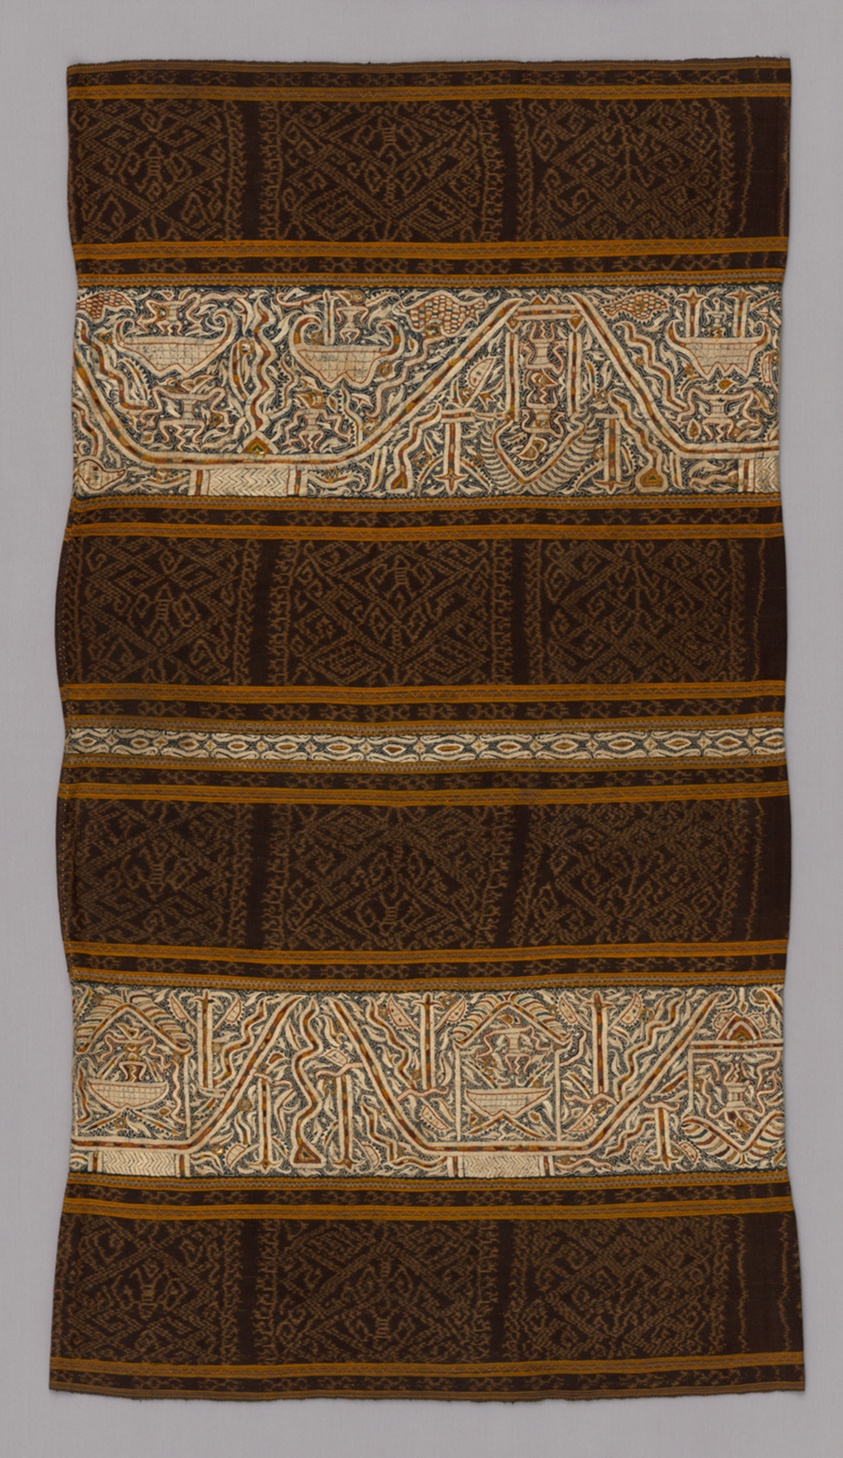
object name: Costume and Accessories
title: Woman's Ceremonial Skirt (tapis)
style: indonesian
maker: Paminggir (Indonesia, Sumatra, Lampung)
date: 19th century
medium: Six panels joined: four panels of stripes of cotton, warp resist dyed (warp ikat), plain weave with paired warps and stripes of cotton and silk warp-faced, weft ribbed plain weave with supplementary brocading wefts and a stripe of cotton, plain weave; embroidered with silk in double running, stem and surface satin stitches and two panels of cotton, plain weave; embroidered with silk in chain, double running, split, and surface satin stitches; mirror pieces; gilt-metal pieces attached with silk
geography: Sumatra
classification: textile; needlework (visual works); costume